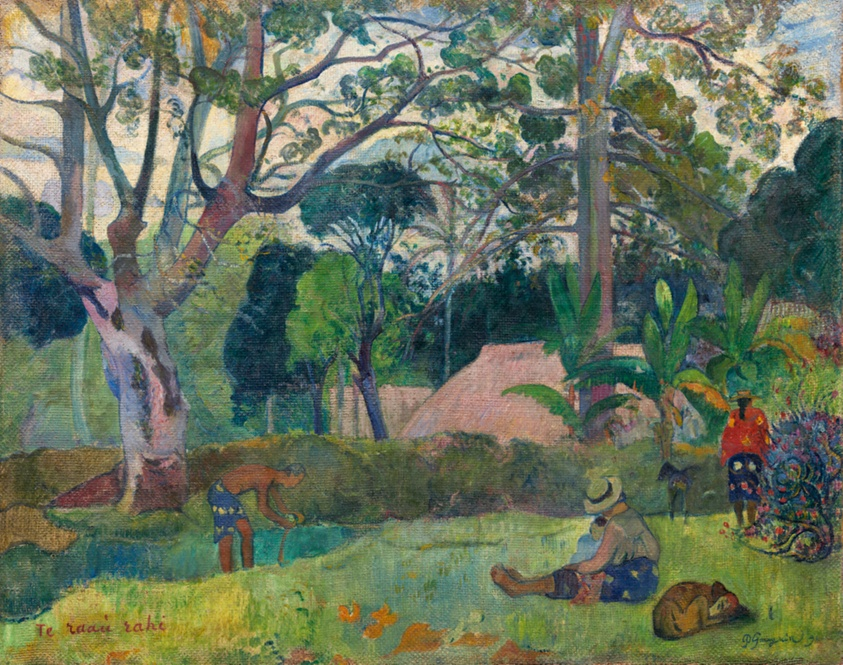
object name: Painting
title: Te raau rahi (The Big Tree)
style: Post-Impressionism, 19th century, nineteenth century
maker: Paul Gauguin (French, 1848–1903)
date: 1891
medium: Oil on jute canvas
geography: France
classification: oil on canvas; oil paintings (visual works); paint; france; french; painting; european painting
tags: landscapes, animals, building, buildings, bushes, clouds, dog, figure, figures, foliage, French, man, men, roof, sky, trees, woman, woman with children, women